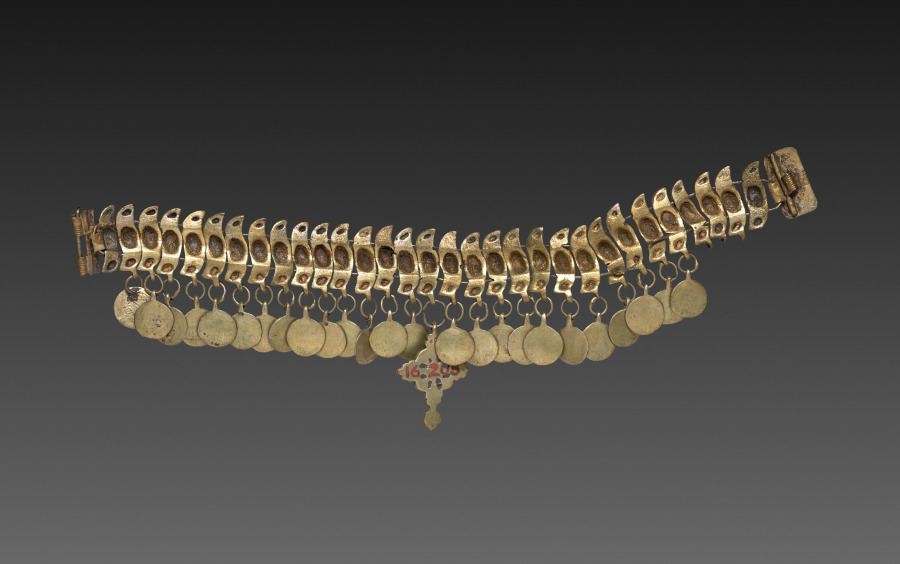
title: Bracelet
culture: Bulgaria, 19th century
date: 1800s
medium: brass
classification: Jewelry